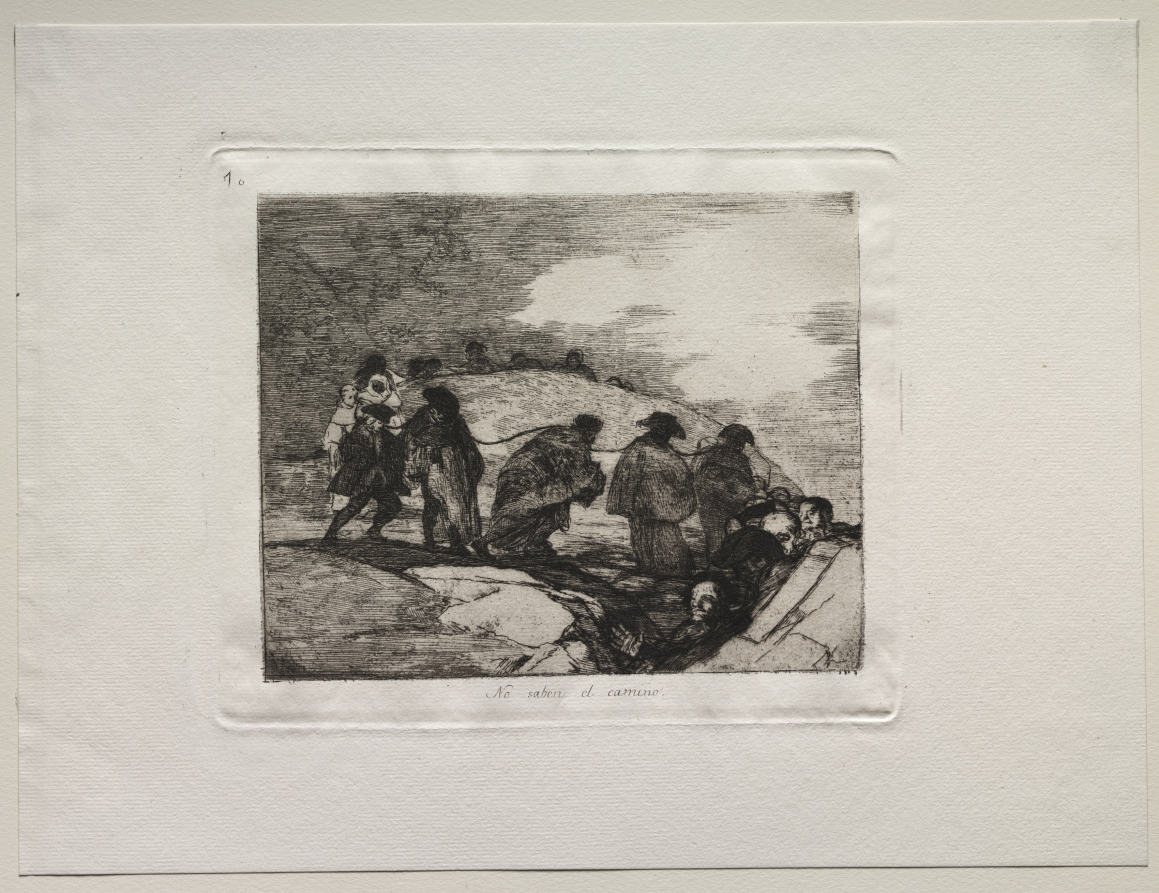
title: The Horrors of War: They Do Not Know The Way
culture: Spain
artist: Francisco de Goya (Spanish, 1746–1828)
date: c. 1810–20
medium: etching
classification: Print